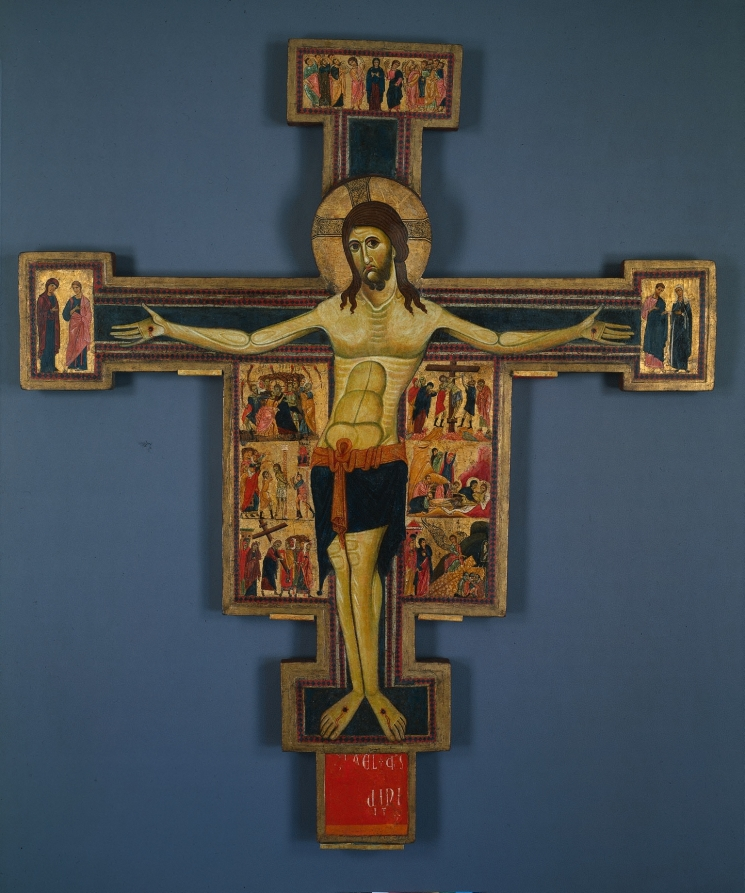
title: Crucifix with Scenes of the Passion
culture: Italy, Pisa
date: c. 1230–40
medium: tempera with gold on panel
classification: Painting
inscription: signed below: [GH]AEL q./...VINI/IT (i.e. Ghael quondam ... vini)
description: Large painted crucifixes dating from the 1100s and 1200s are among the earliest surviving Italian panel paintings. Large crosses, like this beautiful example, were typically suspended high above an altar in the main apse of Italian churches. Smaller crosses were placed on or just above altars in small side chapels. Such crosses served as the visual focus for devotion and symbolized the Eucharistic sacrament performed by the priest on the altar below. This crucifix shows Christ alive on the cross as the triumphant savior of mankind. Smaller images on the "apron" represent images of Christ's Passion (to the left) and his death and Resurrection (to the right). On the far left terminal appear the mourning Virgin and Saint John the Evangelist, while on the right the viewer is shown Saint James Major and Saint Bona, patroness of the city of Pisa. The concluding event, the Ascension of Christ, once appeared on the upper terminal, just above the Virgin and Apostles. The figure of Christ is painted in a severe and hieratic style suggestive of medieval Pisa's artistic and commercial links with the Byzantine East. The appearance of Saint Bona on this cross may suggest that it was made for the Church of S. Martino in Pisa, where Franciscan nuns tended the holy woman's relics.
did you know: Although the artist did sign this panel at the bottom, the signature is illegible, his first name perhaps being Michael.